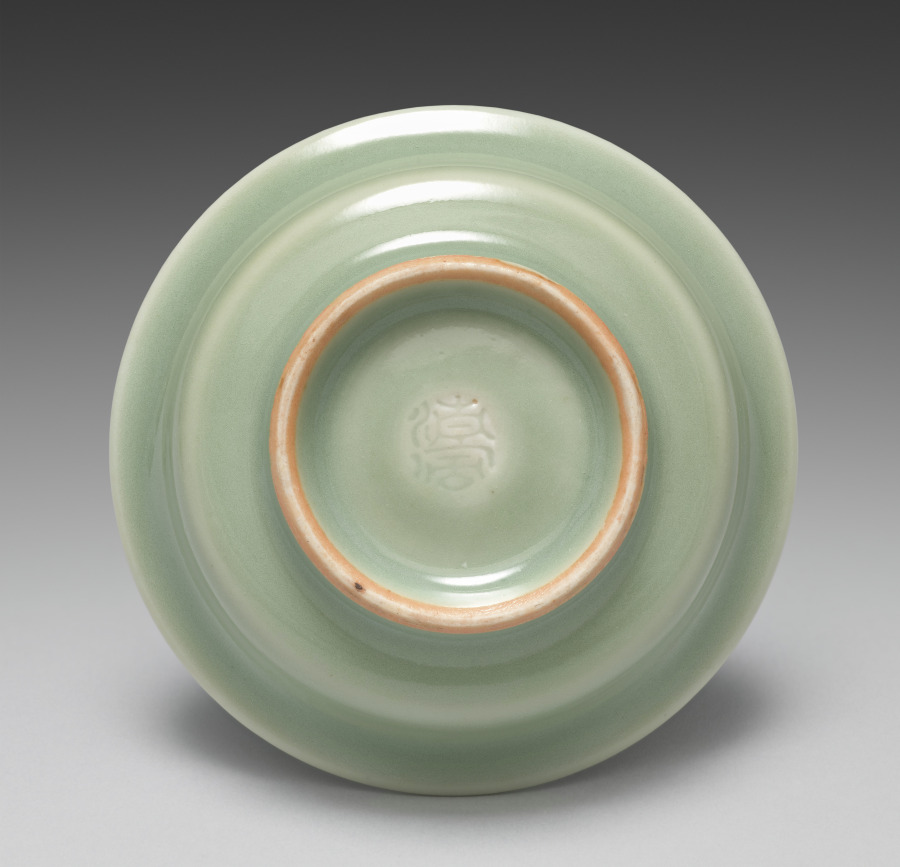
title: Saucer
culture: Japan, Meiji period (1868–1912)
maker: Seifū Yohei III (Japanese, 1851–1914)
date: 1893–1914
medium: One from a set of ten dishes; porcelain with green glaze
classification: Ceramic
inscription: 清風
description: Yohei III’s main output for his sophisticated clientele was in the form of tea sets and dining sets. He created a range of dishes in green glazes. He often produced in pairs, sets of five, or sets of ten. For this set of ten small dishes in a simple, round form that emphasizes the glaze above all, the box lid designates the piece as seiji, or green-glazed porcelain, using a general term for the extensive palette of green glazes often called celadon in English. The box lid further identifies the dishes themselves as tōchō, literally “bean-sized saucers,” a size that makes them suitable for dipping sauces.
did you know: The ten dishes in this set are stored in stacks of five in a two-compartment box.